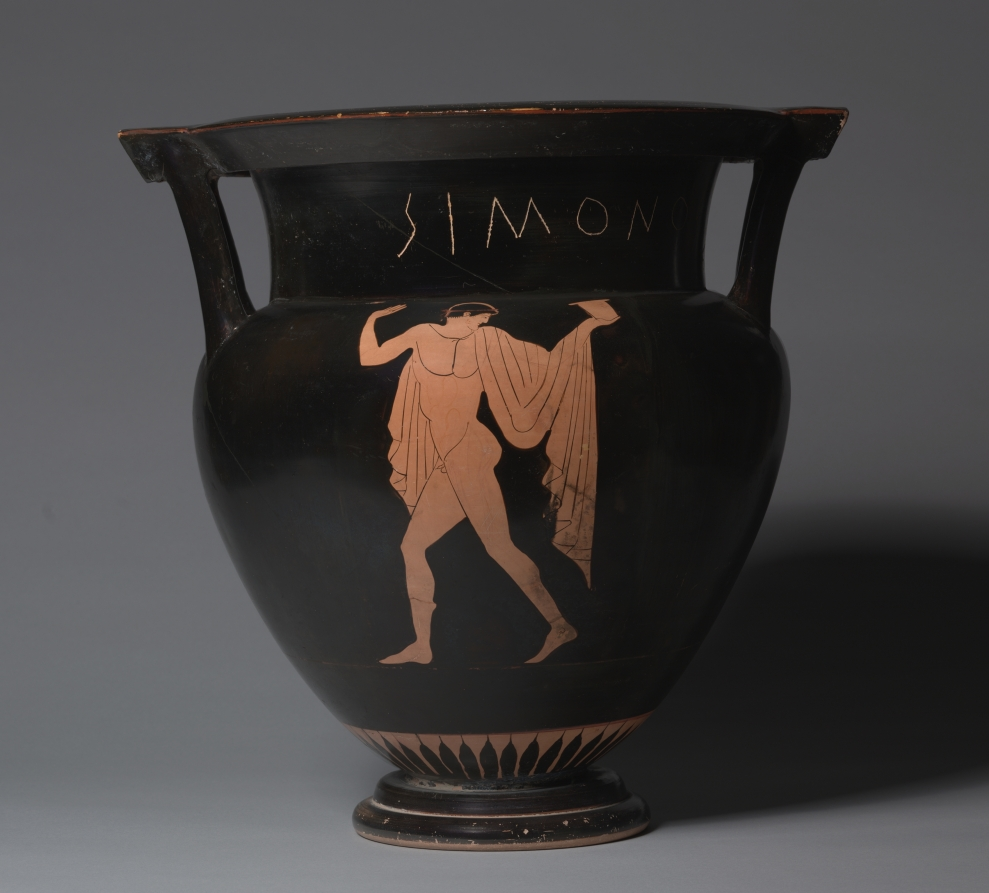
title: Red-Figure Column Krater (Mixing Vessel): Komos (Revel)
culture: Greek, Attic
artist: attributed to Pig Painter (Greek, Attic, active c. 480–460 BCE)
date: 470–460 BCE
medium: ceramic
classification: Ceramic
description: Used for mixing wine and water at a symposium (or drinking party), this column-krater speaks to the perils and pleasures of drinking. On one side, a bearded man holding a staff and a drinking cup leans forward, a red stream of vomit falling from his mouth. Before him is a nude young boy, holding a tortoiseshell lyre and a basket or pail. On the other side, a young man dances, holding a deep cup and wearing just one boot. On the neck above him, scratched in large letters, is the name SIMONOS, probably indicating that the vase once belonged to someone named Simon.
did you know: The bearded man on this vase is vomiting—perhaps a humorous warning against over imbibing.